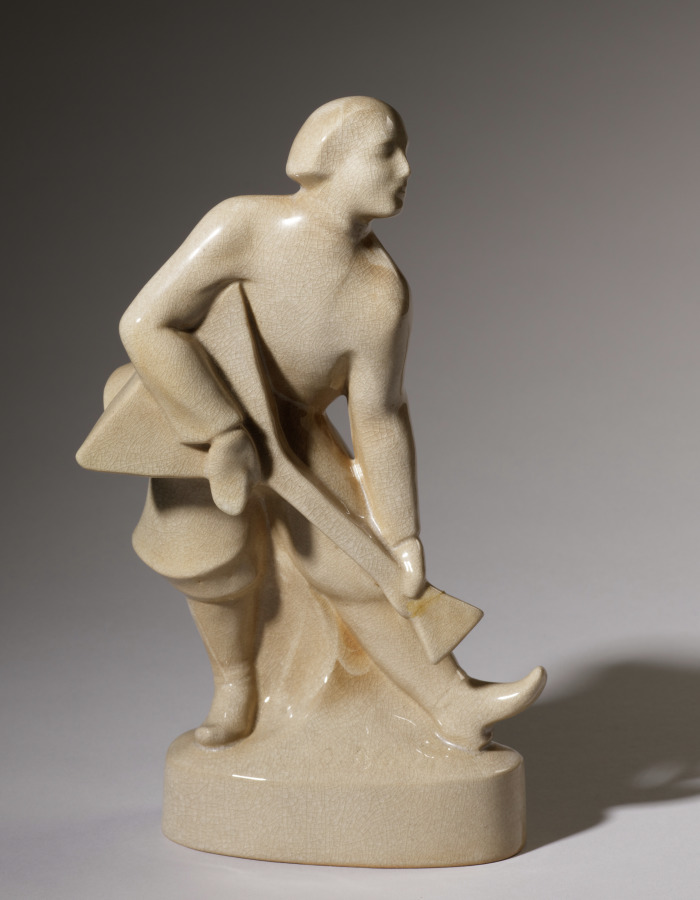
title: Balalaika Player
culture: America, Ohio, Cleveland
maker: Cowan Pottery Studio (America, Rocky River, Ohio, 1920–1931)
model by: Alexander Blazys (American, born Russian Empire [now Lithuania], 1894–1963)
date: 1927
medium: mold-made ceramic, glazed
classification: Ceramic